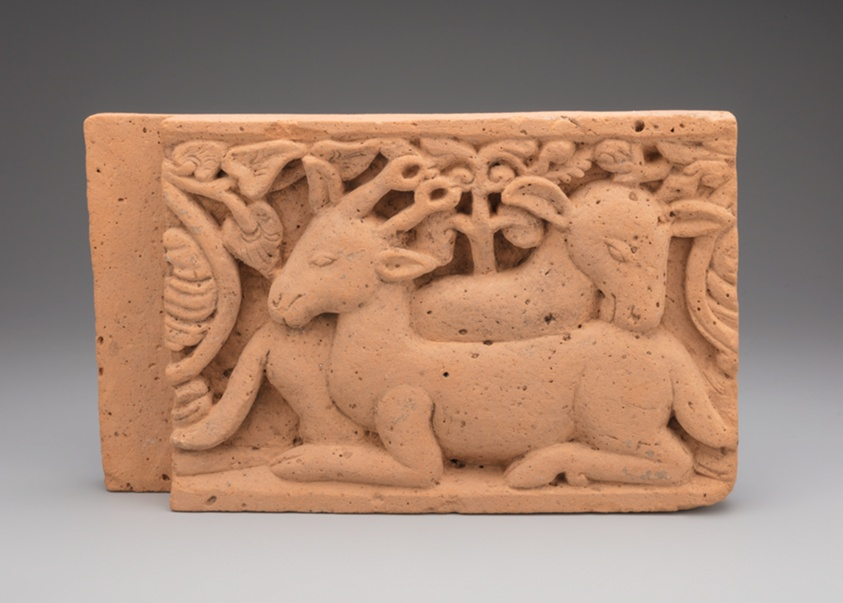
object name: Architectural fragment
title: Architectural Panel with Deer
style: Southeast Asian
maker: Indonesia; Eastern Java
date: 14th/15th century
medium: Terracotta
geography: Eastern Java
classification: earthenware; ceramics; asian art; architectural fragment